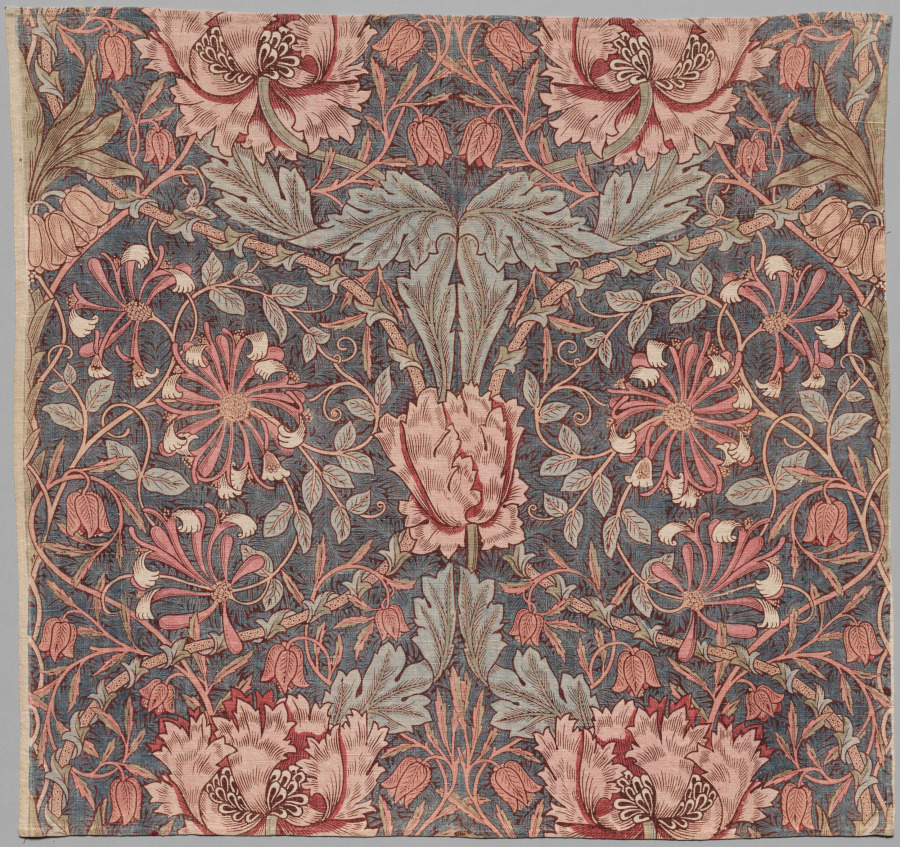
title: Honeysuckle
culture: England, Early 20th century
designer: William Morris (British, 1834–1896)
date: Early 20th century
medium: plain weave linen, printed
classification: Textile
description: William Morris’s daughter May called Honeysuckle “the most truly Morrisian in character of all his pattern-making . . . the most mysterious and poetic—the very symbol of a garden tangle.” Like many Morris textiles from this period, Honeysuckle has a mirrored pattern. At 29 3/4 inches high and 34 3/4 inches wide, this repeat was unusually broad, spanning almost the entire width of the loom. Morris believed that large patterns were more restful to the eye than small patterns, even when used to decorate modestly sized rooms. Designs from this period are a testament to the delight he took in his garden at Kelmscott Manor; he favored the charm of native English flowers above exotic specimens.